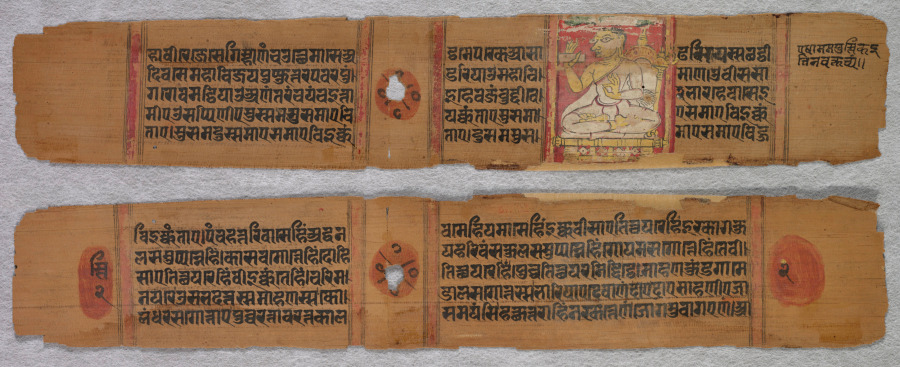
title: Folio 2, from a Kalpa-sutra: A Monk Preaching (recto); Text (verso)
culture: Western India, Gujarat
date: c. 1275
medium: gum tempera and ink on palm leaf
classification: Painting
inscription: [[recto, right margin]] esa mama pustika iti na vaktavyam